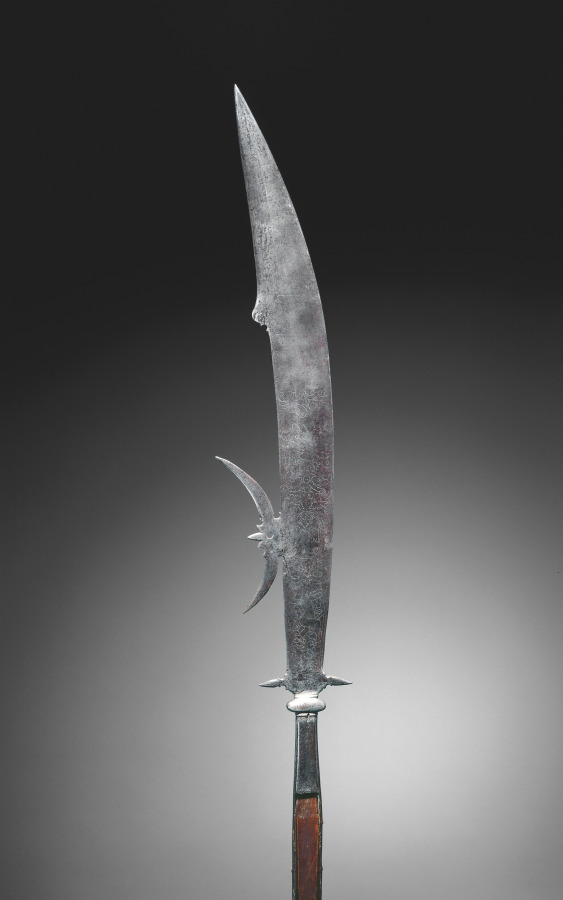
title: Glaive (with Arms of Giustini Family)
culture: Italy, Venice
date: c. 1600–1620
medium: steel, etched; wood haft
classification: Arms and Armor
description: A glaive is a long staff weapon with a large cleaver or knife-like blade. The flat steel blade is conducive to ornamental decoration such as heraldic devices. The decorative nature of this weapon made it a favorite for ceremonial use.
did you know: The large number of surviving glaives that are decorated with the arms of Venetian families indicate its popularity in the city of Venice.